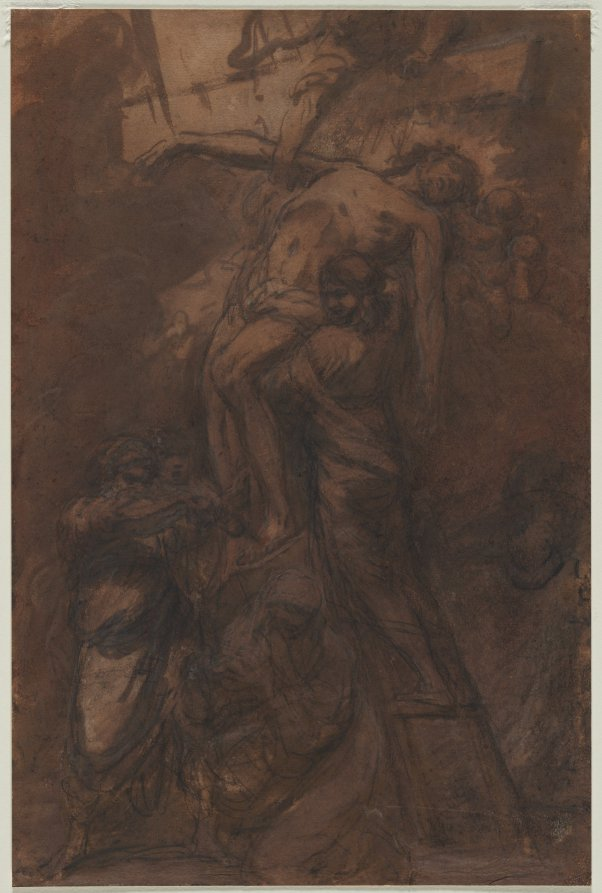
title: Descent from the Cross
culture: Flanders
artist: Anonymous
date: 1600s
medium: black chalk or crayon, and brush and brown wash, with traces of red chalk heightened with white gouache; framing lines in black ink (bottom)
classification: Drawing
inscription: VERSO OF SECONDARY SUPPORT, upper left, in graphite: 2[45?]6 ; lower center, in black ink: Rubens ; lower right, in graphite: A. F. [erased] Callet ; lower right, in graphite: 3759